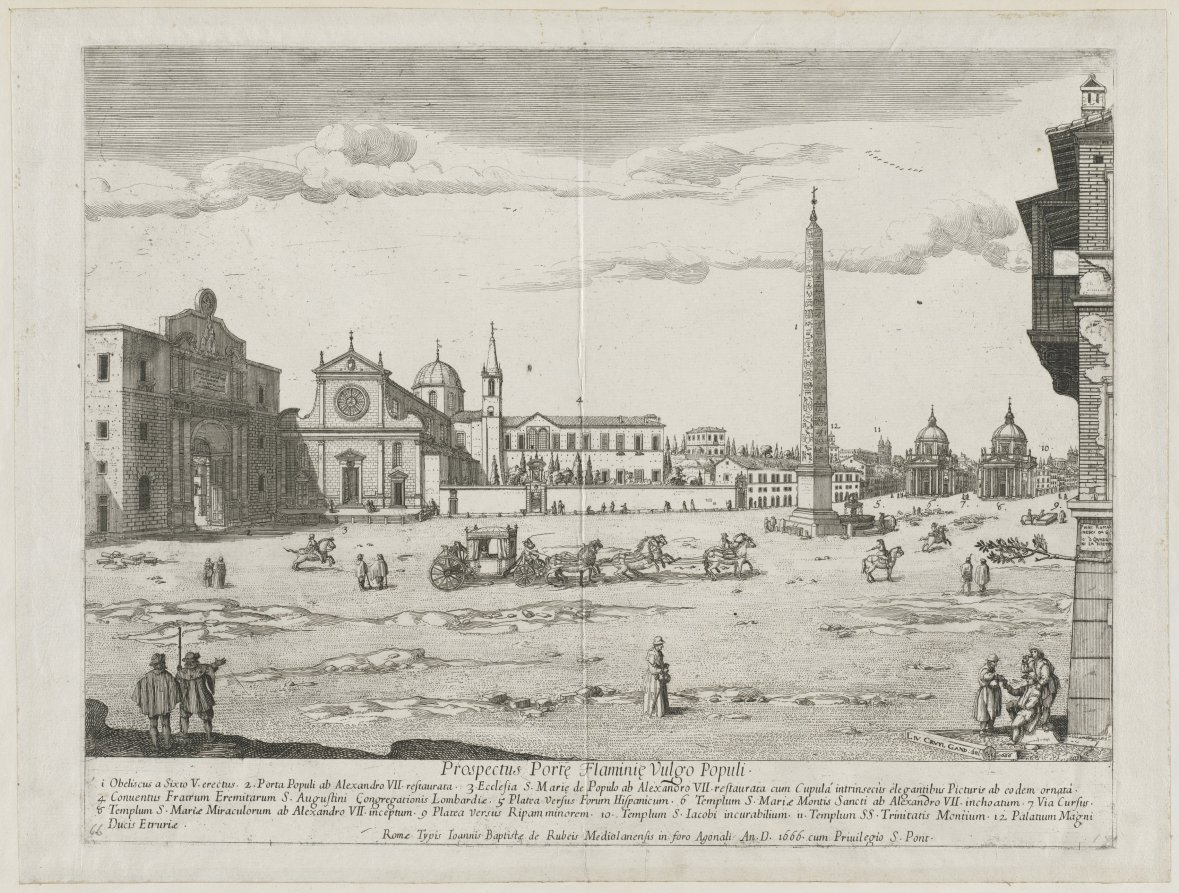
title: Piazza del Popolo from "Prospectus Locurum Urbis Romae Insign[ium]"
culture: Flanders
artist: Lievin Cruyl (Flemish, c. 1640-c. 1720)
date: 1666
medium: etching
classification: Print